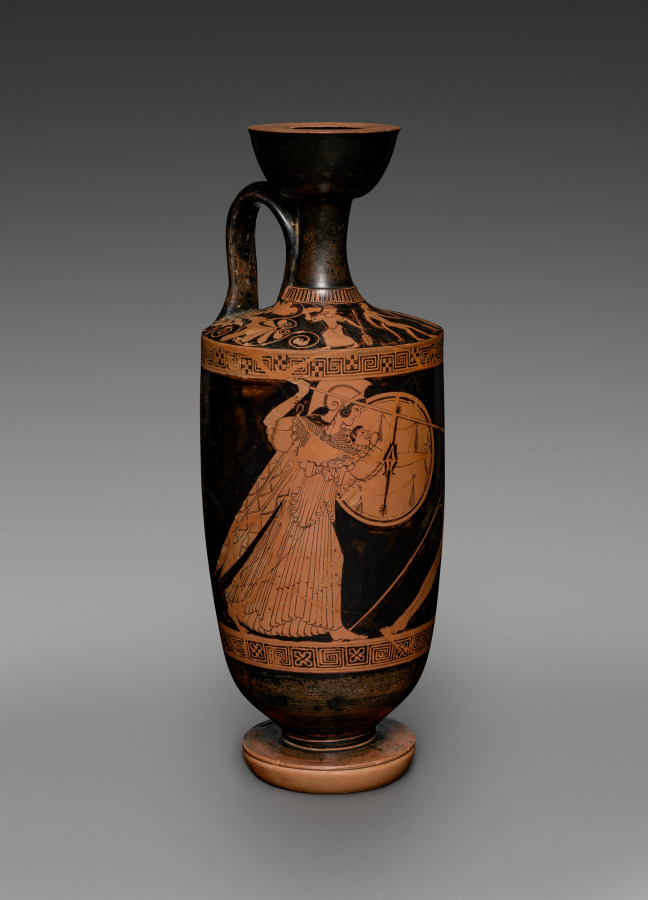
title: Red-Figure Lekythos (Oil Vessel): Athena Slaying Giant (body); Satyr between Maenads (shoulder)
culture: Greek, Attic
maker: attributed to Berlin Painter (Greek, Attic, active c. 505–460 BC)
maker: attributed to Painter of Goluchow 37 (Greek, Attic, active c. 490–460 BC)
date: c. 490 BCE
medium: ceramic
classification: Ceramic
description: The two separate areas of figural decoration on this vase have been attributed to different painters: the small satyr and maenads on the shoulder to the Berlin Painter; and the larger figures of Athena and the slain Giant Enkelados on the body to the Painter of Goluchow 37. Scholars have named these two painters, whose actual names remain unknown, after other vases they have painted, now in Berlin and Warsaw. The victory of Athena and the Olympian gods over the Giants has been interpreted as a metaphor for the Greek victory over the Persians around the time this vase was made. Thus, although Enkelados appears as a fully armed warrior, he falls in utter and complete defeat—bleeding from multiple wounds, eyes rolling back, sword dropping from his hand.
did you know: First attributed to Douris, this vase is now thought to have been painted by two anonymous painters.